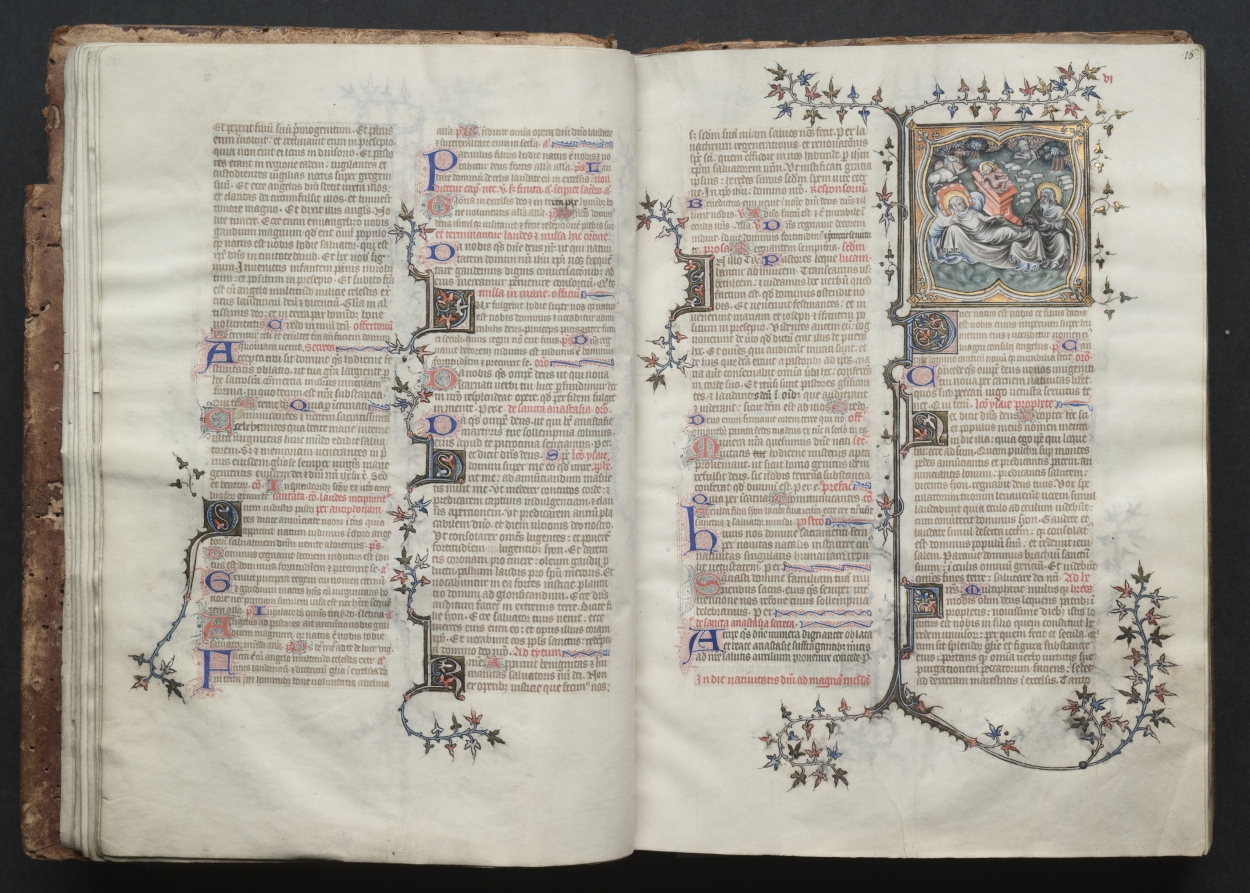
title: The Gotha Missal: Fol. 15v, Text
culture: France, Paris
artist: Master of the Boqueteaux (French)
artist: and Workshop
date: c. 1375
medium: ink, tempera, and gold on vellum; blind-tooled leather binding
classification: Bound Volume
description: The style and quality of this manuscript's decoration is typical of deluxe Parisian books made for aristocratic or royal patrons. Most of the book's decoration appears to be the work of the Master of the Boqueteaux, an artist active at the court of King Charles V (died 1380). His style was apparently shared by a number of book illuminators working in and around Paris. It is very possible that the Gotha Missal belonged to Charles V, but is not provable because the manuscript has no royal portraits and lacks a colophon. Given the book's magnificent decoration, however, it would seem that it was produced for a Valois prince, if not for the king himself. The manuscript receives its name from the German dukes of Gotha, its later owners.